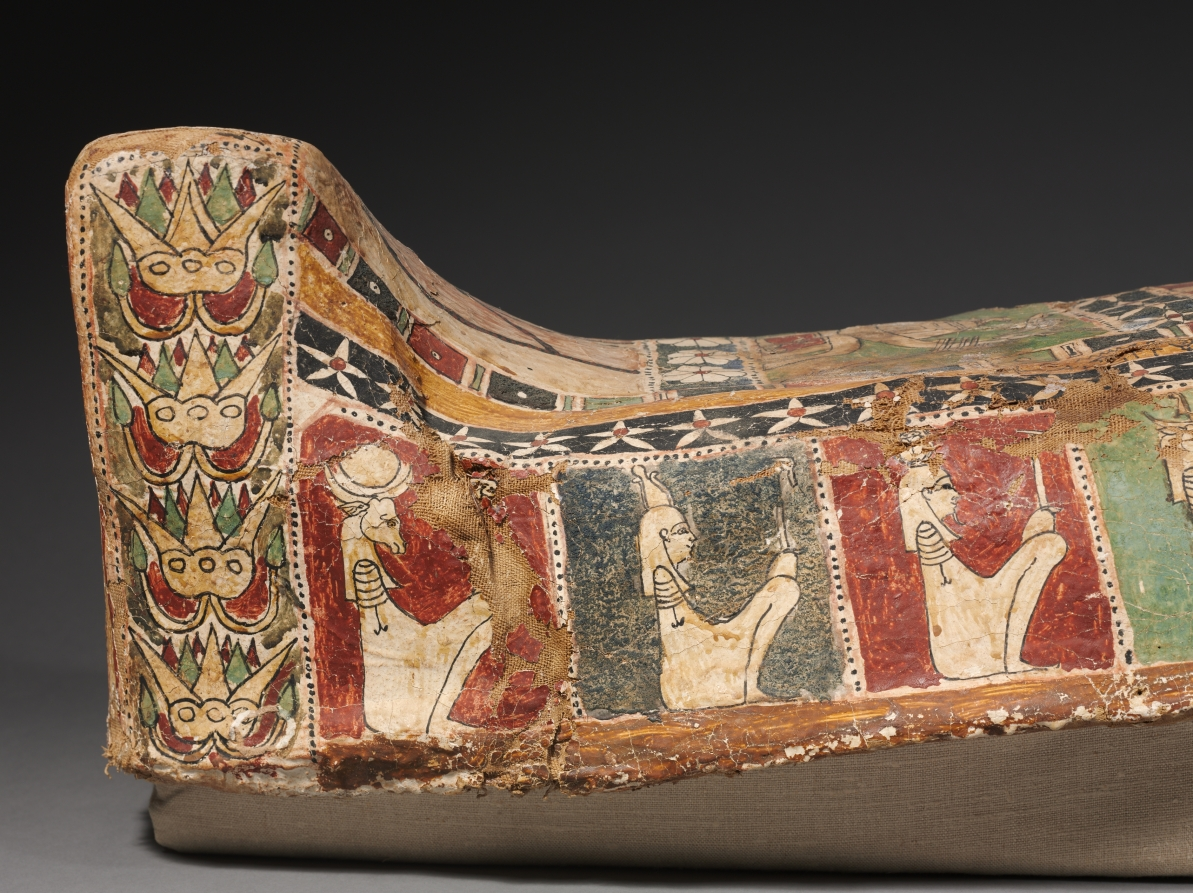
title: Cartonnage Mummy Case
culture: Egypt, Greco-Roman period (332 BCE–395 CE), Ptolemaic dynasty (305–30 BCE)–Roman empire (30 BCE–395 CE)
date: c. 50 BCE–50 CE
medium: cartonnage, painted and gilded, with glass inlays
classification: Funerary Equipment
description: This mummy case is made of cartonnage, a material similar to papier-mâché, but using layers of linen rather than paper. Cartonnage mummy cases such as these are contemporary with funerary portraits painted on wood or linen, although they present a very different appearance. The face, modeled in plaster, is bland and idealized, although the effect of the gilding and glass inlays is quite dazzling. The body is painted with traditional, age-old funerary motifs: the god Osiris, seated and mummiform; the fetish of Abydos, holy city of Osiris, flanked by standing deities (Thoth and Shu); a Horus falcon with outspread wings, and the bark of Sokar. Below these are the sandaled feet of the deceased. On the sides are rows of seated deities. On the top of the head are a winged scarab beetle flanked by Anubis jackals. On the foot are painted the soles of the deceased’s sandals, flanked by scorpions for protection.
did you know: This coffin is smaller and later in date than the other coffins in this gallery. It is made of cartonnage, which used layers of linen to create a material similar to papier-mâché. The painted portrait head displays the influence of Roman portraiture at this time and incorporates both gilding and glass inlays. Despite the fragile materials, this mummy case survived due to the very dry desert climate in which it was found.